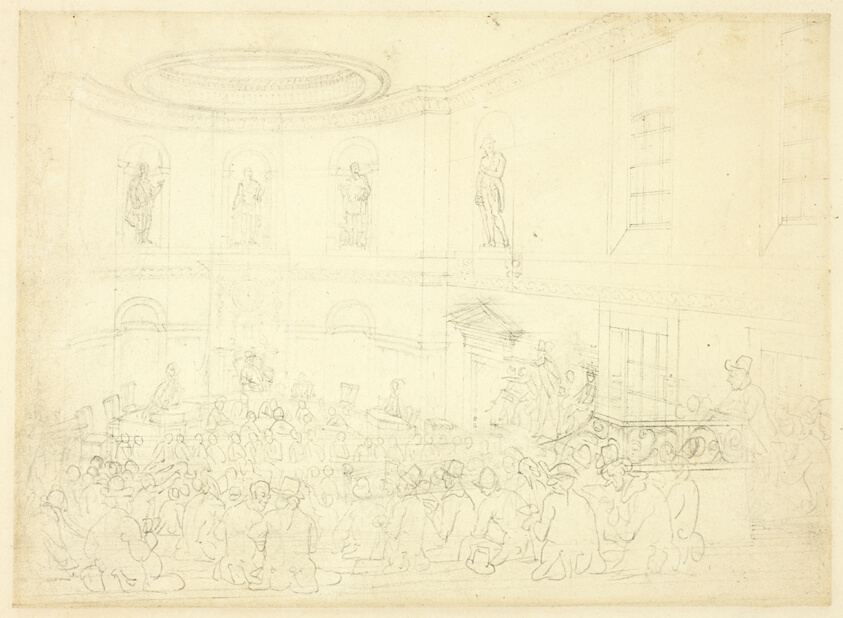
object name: Drawing and Watercolor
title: Study for India House, the Sale Room, from Microcosm of London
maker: Augustus Charles Pugin (English, born France, 1762-1832); Thomas Rowlandson (English, 1756-1827)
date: c. 1809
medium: Graphite on cream wove paper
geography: England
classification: graphite; drawings (visual works); prints and drawing